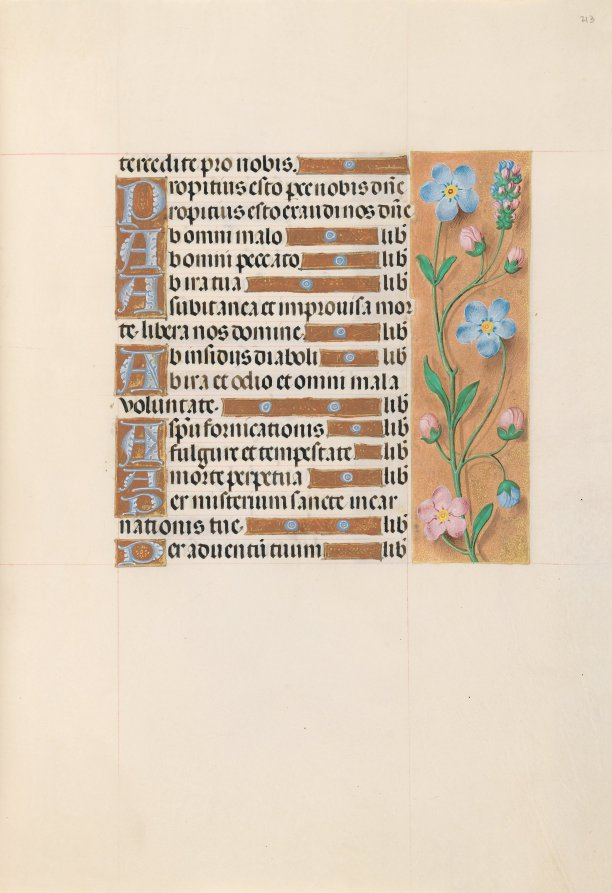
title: Hours of Queen Isabella the Catholic, Queen of Spain: Fol. 213r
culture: Flanders, Ghent and Bruges, late 15th century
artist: Master of the First Prayerbook of Maximillian (Flemish, c. 1444–1519)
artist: and Associates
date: c. 1500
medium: ink, tempera, and gold on vellum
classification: Bound Volume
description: This manuscript was illuminated by a circle of at least five highly organized manuscript painters active in the Flemish cities of Ghent and Bruges. The principal illuminator was Alexander Bening, who painted the majority of the book's miniatures. Manuscripts produced by this circle of artists are renowned for the decoration of their borders, which typically feature a rich variety of realistically-painted flowers, birds, and butterflies. This prayer book, called a book of hours, was intended not for a cleric, but for the private devotions of a lay person-in this case, Isabella the Catholic, Queen of Spain (1451-1504). Isabella's coat of arms embellishes the book's frontispiece. It is unlikely that the book was commissioned by the Queen herself; rather, she probably received it as a diplomatic gift from someone courting her patronage, perhaps Cardinal Francisco Jimenez de Cisneros. A Franciscan friar, Jimenez was dependent upon Isabella for his advancement, first to the post of Queen's confessor in 1492, and then to Archbishop of Toledo in 1495.